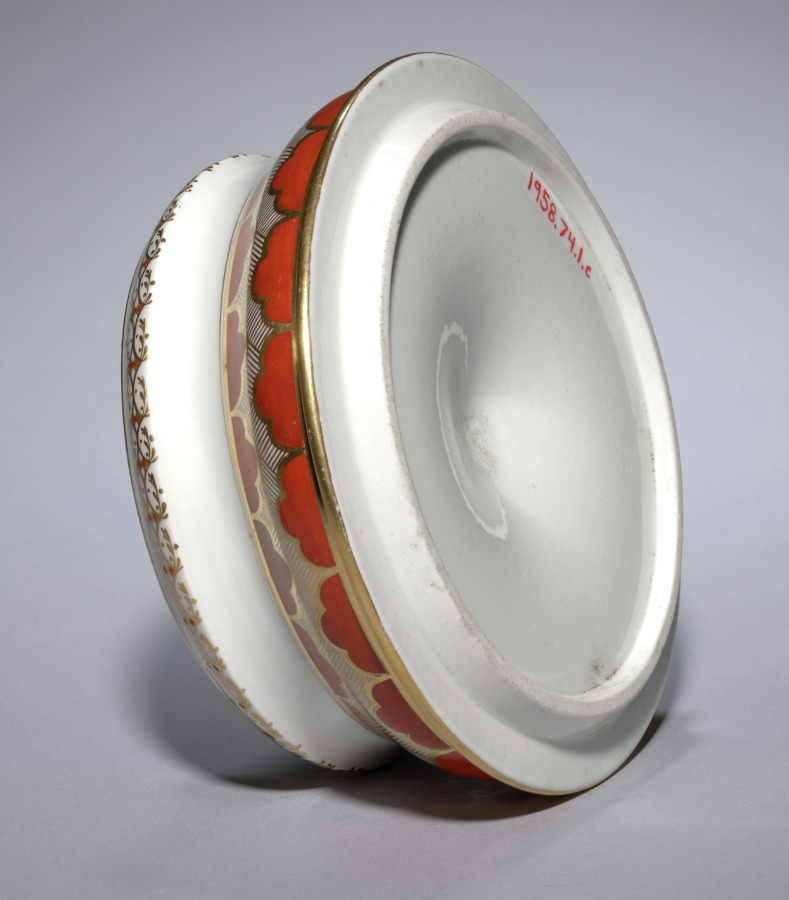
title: Cover for an Ice Pail (1 of 2)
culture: England, late 18th-early 19th Century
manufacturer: Flight & Barr (British)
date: c. 1792–1804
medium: porcelain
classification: Ceramic